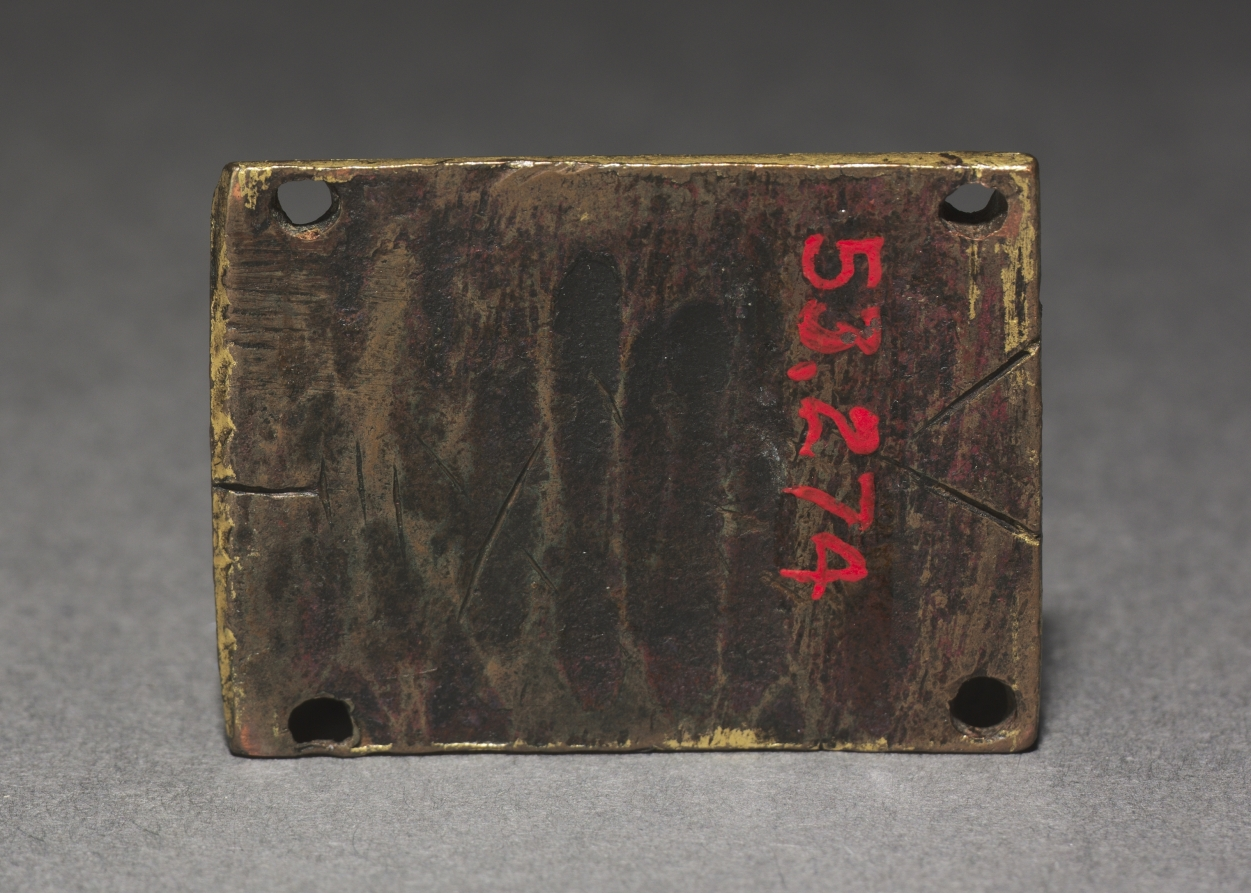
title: Plaque from a Reliquary Shrine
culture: Germany, Rhine Valley, Cologne, Romanesque period, 12th century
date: c. 1170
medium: gilded copper; champlevé and cloisonné enamel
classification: Enamel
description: These decorative enamel plaques (1953.274, 1953.638, 1957.502, and 1961.27) have been linked to some of Cologne's most important reliquary shrines, namely the shrine of the Three Kings at Cologne Cathedral and the shrines of Saints Maurinus and Albinus in the Benedictine abbey church of Saint Panteleon.